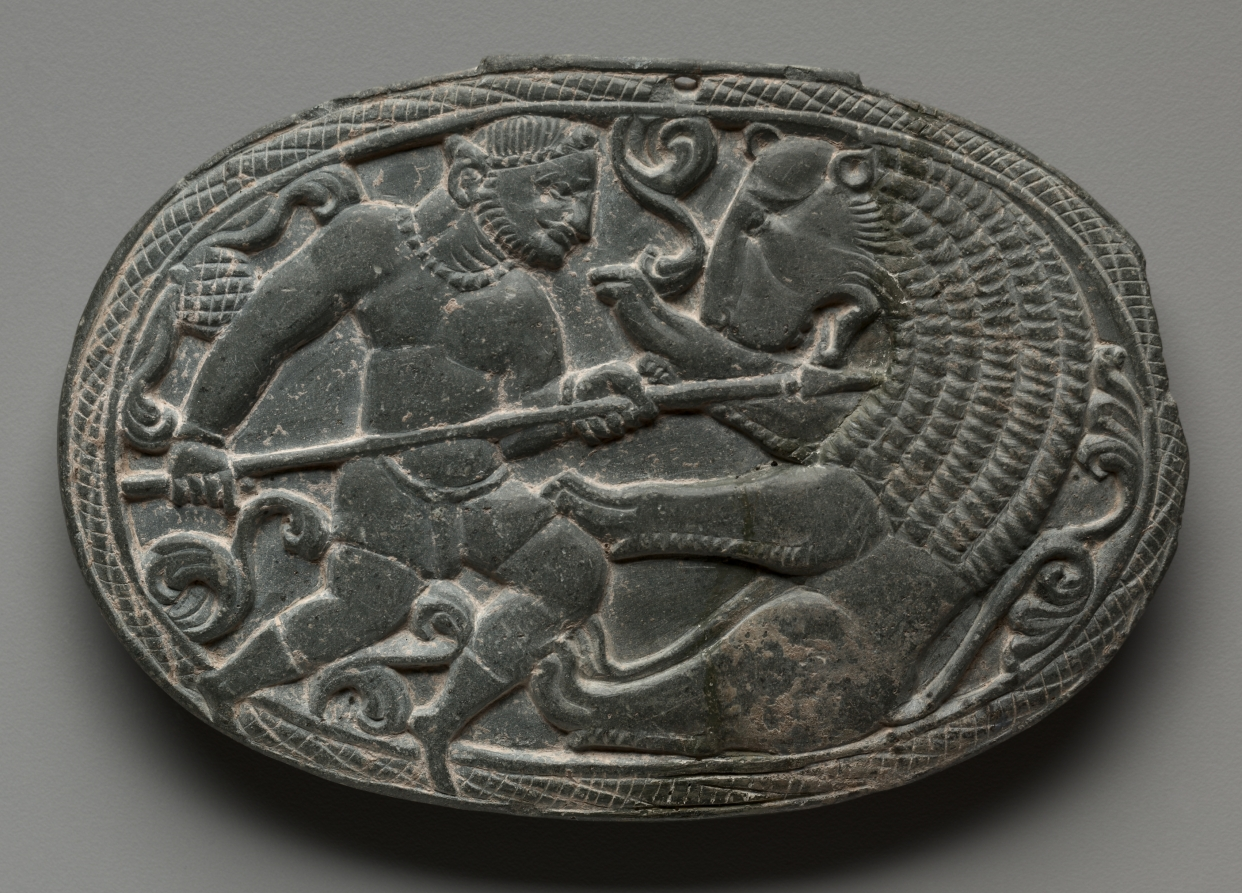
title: Lid with Combat between a Man and a Lion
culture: Pakistan, Gandhara, late Kushan period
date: c. 200s–300s CE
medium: steatite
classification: Sculpture